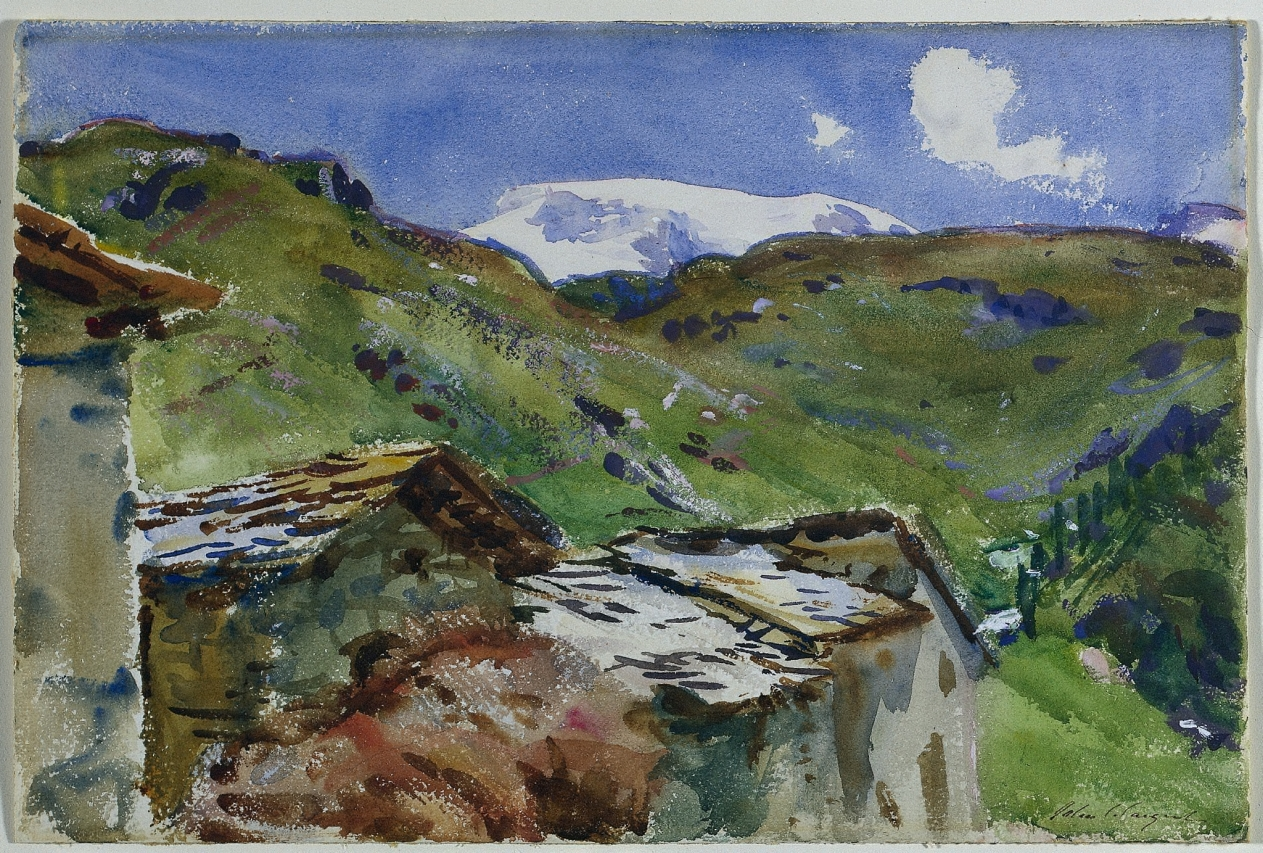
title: In Austrian Tyrol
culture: America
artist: John Singer Sargent (American, born Italy, 1856–1925)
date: 1911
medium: watercolor with traces of graphite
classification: Drawing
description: Although Sargent’s career was defined by his portraits of high-society patrons, privately he painted landscapes in watercolor and oil throughout his career. After the turn of the century, assured of his reputation, Sargent produced more landscapes than any other kind of painting. Alpine views were among his favorite subjects, but he avoided associating them with the rhetoric of the sublime. Instead, mountain views such as In Austrian Tyrol were closely cropped, often rendered from a low vantage point. The visual relationship between the shapes of the foreground rocks and the mountains themselves was what captured his attention.